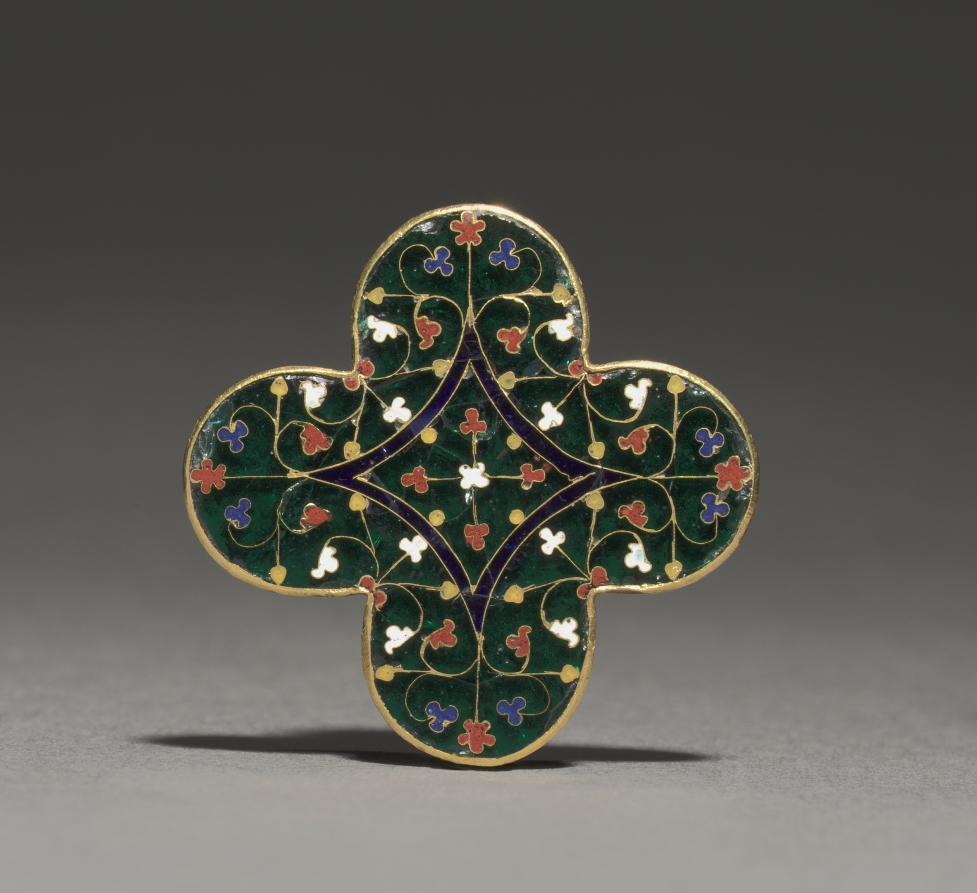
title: Quatrilobed Plaque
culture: France, Paris, Ile-de-France, Gothic period, early 14th century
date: c. 1280–1300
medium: Gold, translucent enamel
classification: Metalwork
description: This rare four-lobed plaque is a superb example of émail de plique, a virtuoso enameling method popular in Paris during the late 1200s with the court of Philip the Fair (reigned 1285–1314). Plaques like this were prepared in advance to be attached to larger works including crosses, chalices, reliquaries, or even sewn into precious fabrics for decoration. Given the very distinctive shape of this plaque it is certain to have been created for a specific commission.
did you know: Julien was not the only artisan to produce émaux de plique; therefore, an exact attribution to an artist is problematic.